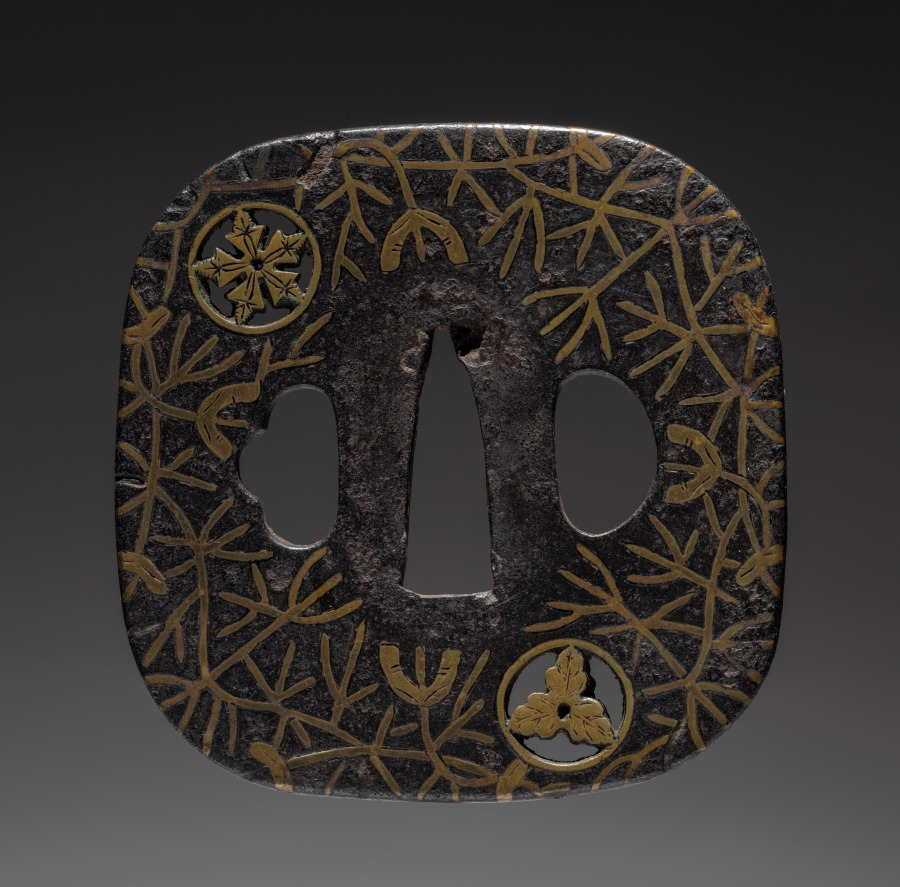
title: Sword Guard (Tsuba)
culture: Japan, possibly Edo period (1615-1868)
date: c. 1615–1868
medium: iron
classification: Arms and Armor